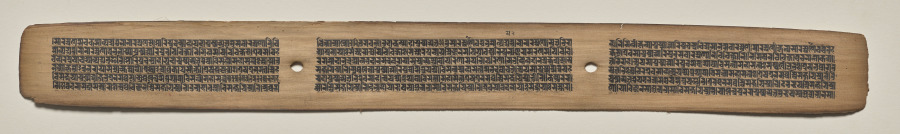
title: Text, Folio 126 (recto), from a Manuscript of the Perfection of Wisdom in Eight Thousand Lines (Ashtasahasrika Prajnaparamita-sutra)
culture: Eastern India, Bihar, Vikramashila Monastery. Painting: Nepal, Kathmandu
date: Sunday, September 14, 1119 (year 239 of the Newar Samvat in the month of Ashvina)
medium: gum tempera and ink on palm leaves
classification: Painting